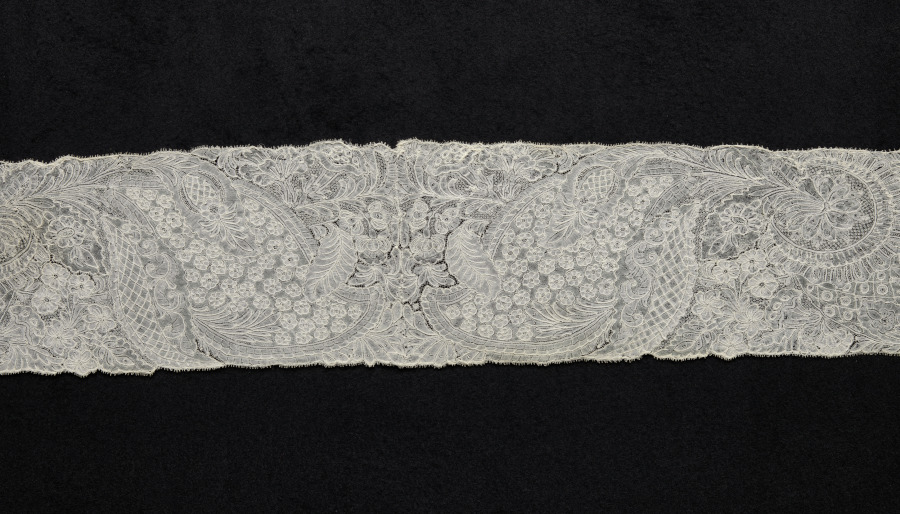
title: Lace Lappet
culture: Flemish, Brussels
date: 1700–1750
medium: Linen: bobbin lace (point d'Angleterre)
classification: Lace